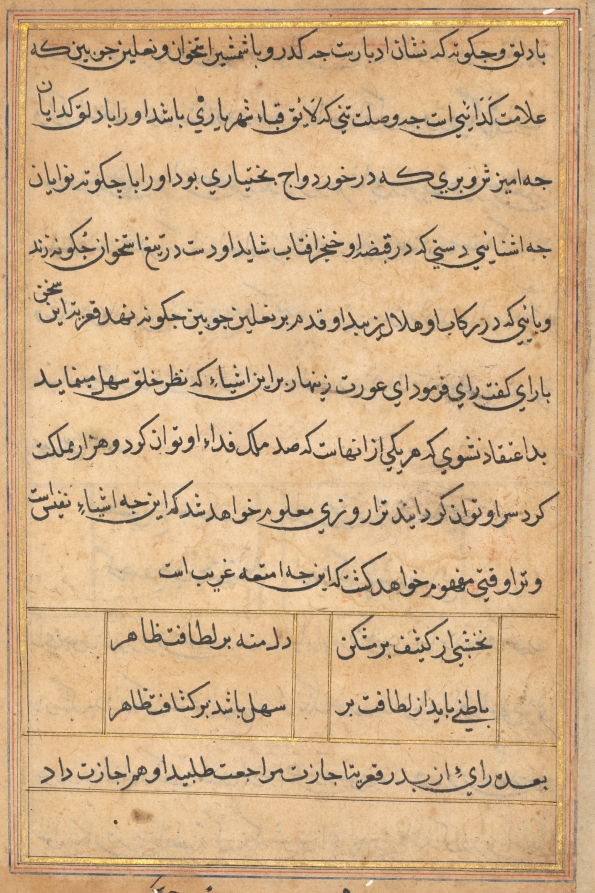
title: Page from Tales of a Parrot (Tuti-nama): text page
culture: Mughal India, court of Akbar (reigned 1556–1605)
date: c. 1560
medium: gum tempera, ink, and gold on paper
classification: Painting